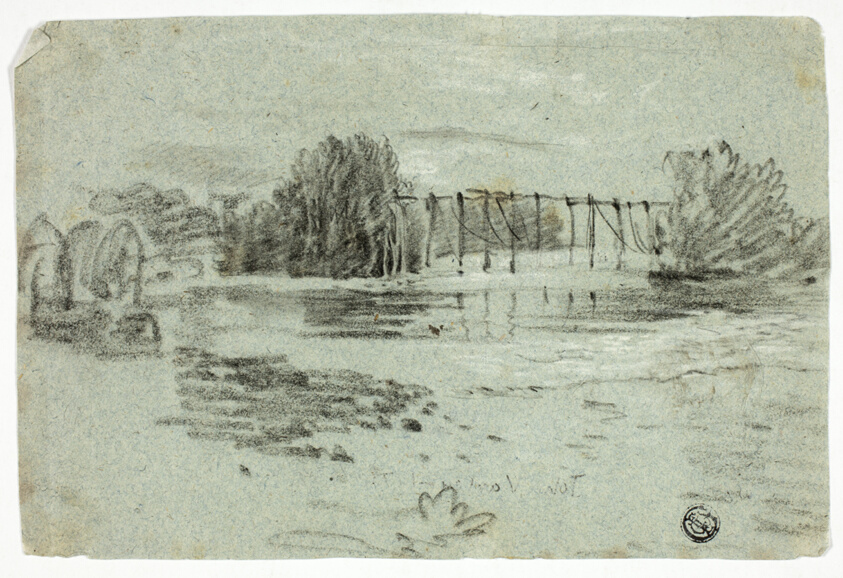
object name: Drawing and Watercolor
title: Stream and Trestle Bridge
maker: Attributed to William Turner (English, 1789-1862); or John Varley (English, 1778-1842)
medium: Charcoal, heightened with white chalk, on blue wove paper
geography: England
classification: chalk; paper; charcoal; drawings (visual works); prints and drawing